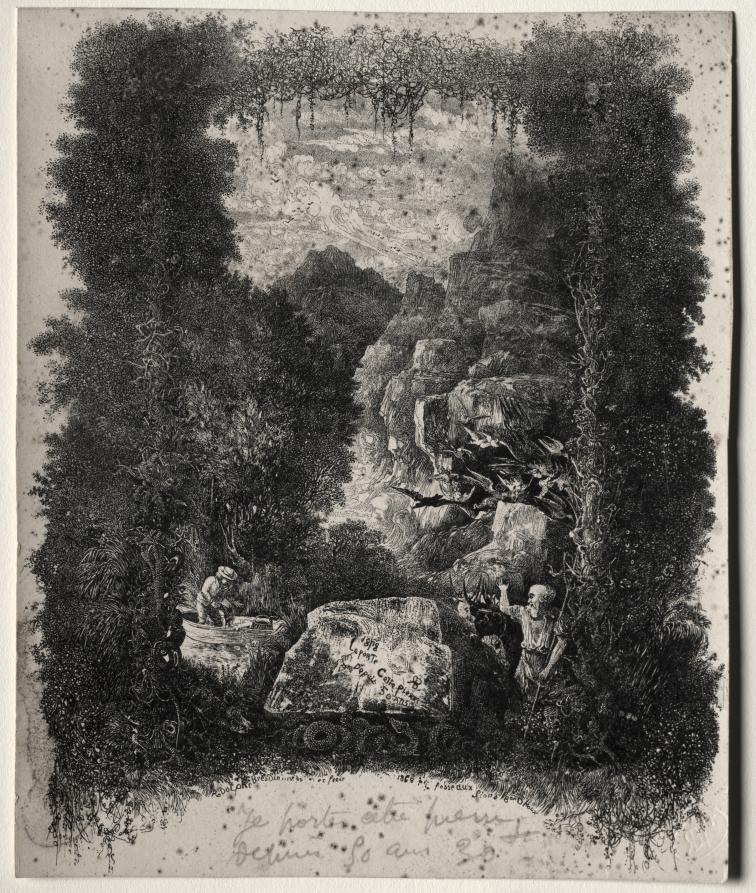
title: First Frontispiece for Fables and Fairy-Tales by Thierry-Faletans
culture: France, 19th century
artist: Rodolphe Bresdin (French, 1822–1885)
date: 1868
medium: lithograph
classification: Print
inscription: across bottom, in graphite: Je porte cette pierre depuis 50 ans 30+(?); lower left, in stone: Rodolphe Bresdin inv. et fecit; lower right, in stone: 1868 fosse aux lions Bordeaux